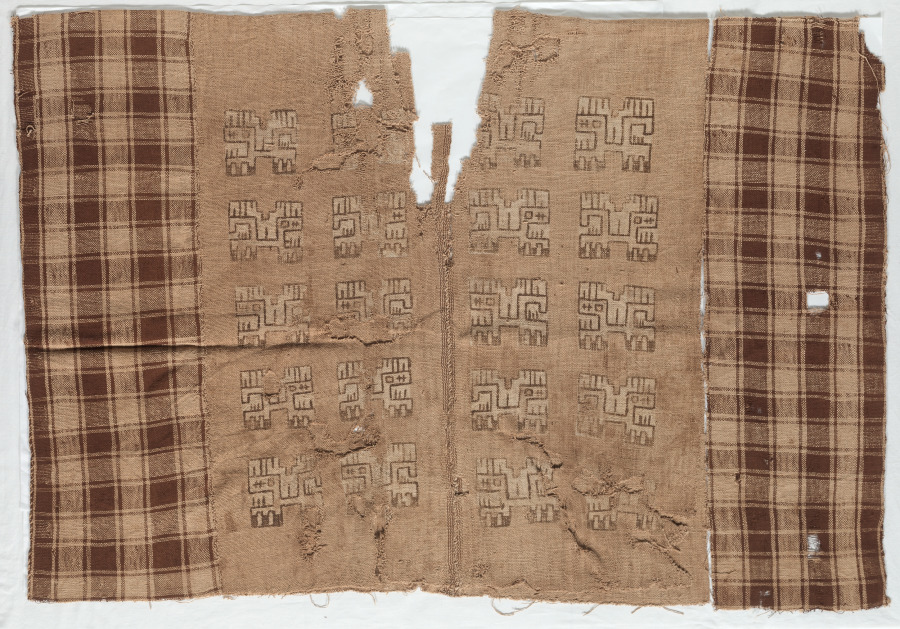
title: Tunic with Profile Animals and Checkerboards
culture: Peru, South Coast, Paracas or Nasca?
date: 410–540 CE (radiocarbon date, 93% probability)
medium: cotton; dye-patterned plain weave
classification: Textile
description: The imagery in the central field of this unique tunic—animals with long tails and three-toed feet—seems to have been created by painting a slurry-like material on the pale areas to protect them when the fabric was immersed in a bath that turned other areas light brown. Then the slurry was removed, revealing the pattern. The checkerboard areas at the sides, on the other hand, are woven with brown and cream-colored yarns. Specialists puzzle over the origins of the tunic, some attributing it to the Paracas (700 BCE–1 CE) and others to the Nasca (100 BCE–650 CE), who sprang from Paracas roots.